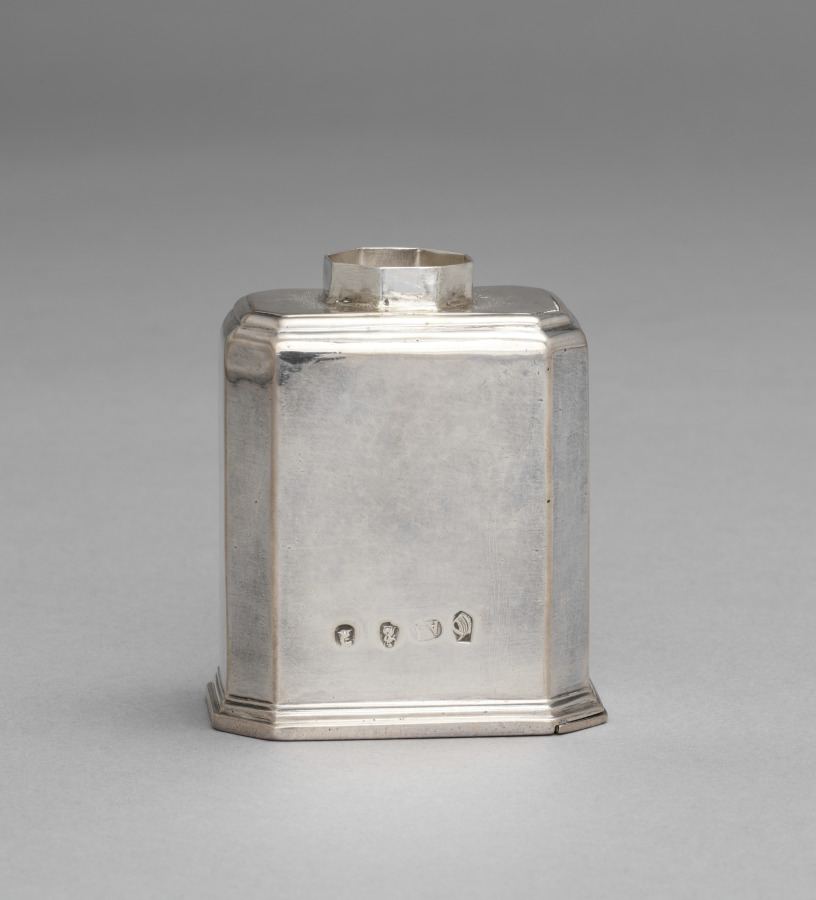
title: Tea Caddy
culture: England, London, 18th century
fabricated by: Thomas Ash (British)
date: 1713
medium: silver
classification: Silver